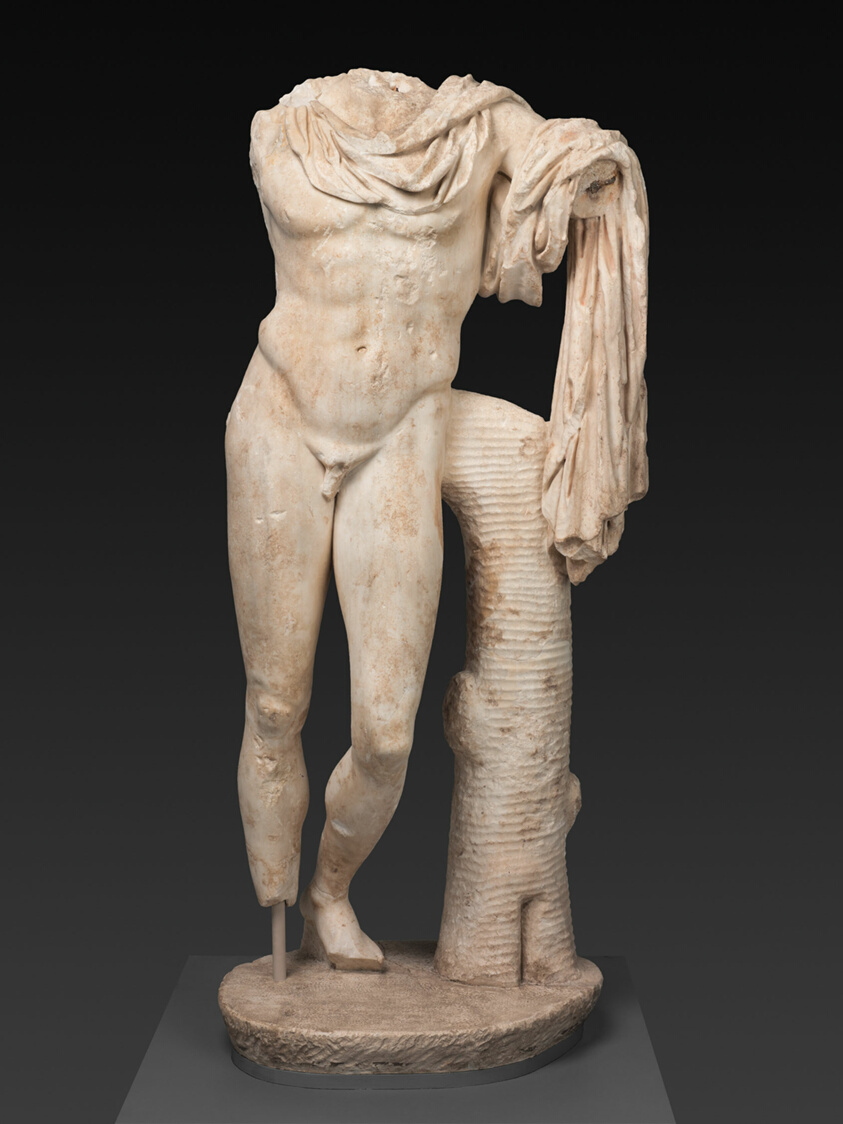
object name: Sculpture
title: Statue of Meleager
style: roman (ancient, style or period), late antique, ancient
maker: Roman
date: 1st-2nd century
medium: Marble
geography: Roman Empire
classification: sculpture; marble; stone; ancient art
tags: mythology